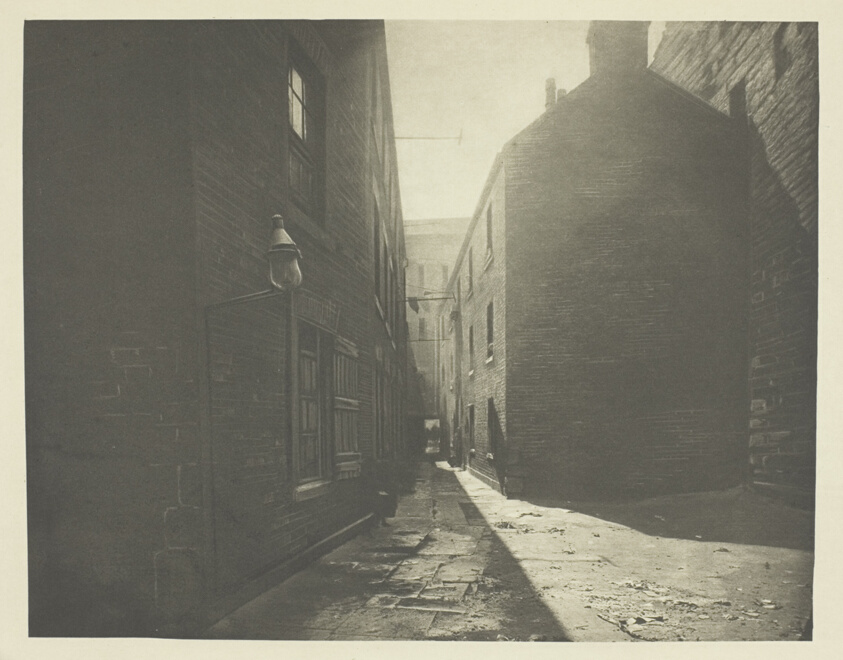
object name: Photograph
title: Close No. 29 Bridgegate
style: 19th century, Pictorialism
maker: James Craig Annan (Scottish, 1864-1946)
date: 1897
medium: Photogravure, plate 42 from the book "The Old Closes & Streets of Glasgow" (1900)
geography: Scotland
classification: photograph; photography